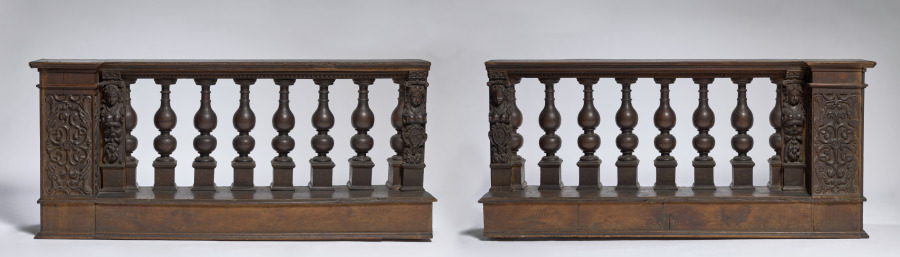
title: Balustrade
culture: Italy, 17th century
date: c. 1630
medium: carved and turned walnut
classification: Furniture and woodwork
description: This balustrade, or railing, was probably intended for use in a private house, perhaps to set off a bed alcove.